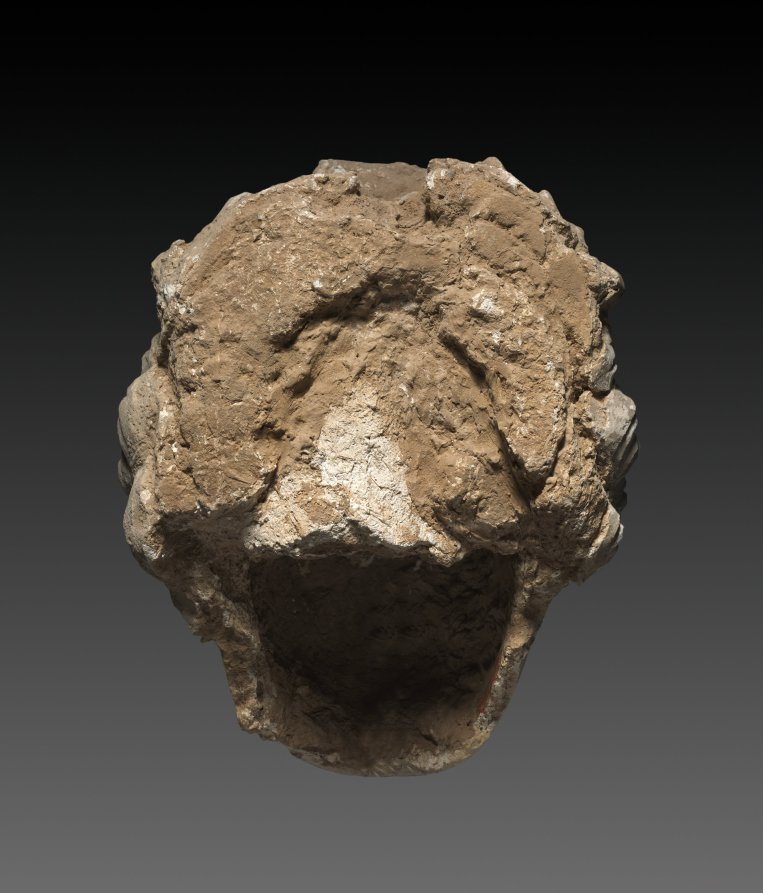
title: Head of Bodhisattva Avalokiteshvara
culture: Afghanistan or Pakistan, Gandhara, Kushan period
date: 300s–400s CE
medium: stucco with traces of paint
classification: Sculpture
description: By this period, individual bodhisattvas were beginning to be revered as ideal figures who would deliberately postpone their own enlightenment and entrance into final nirvana, which is a state from which no one returns to be reborn into this world. Bodhisattvas accomplish all but the final meditation leading to full enlightenment, but they are considered to be so advanced in their practice and realization that they have the ability to control their rebirth and act in righteous and compassionate ways to help others achieve enlightenment. Because the remains of a lotus pedestal on which a Buddha sat is at the center of the diadem, this head can be identified as that of the Bodhisattva of Compassion. The idealized linearity of the brows and eyes along with the formalized waves of hair give an ethereal quality to the otherwise naturalistic face.